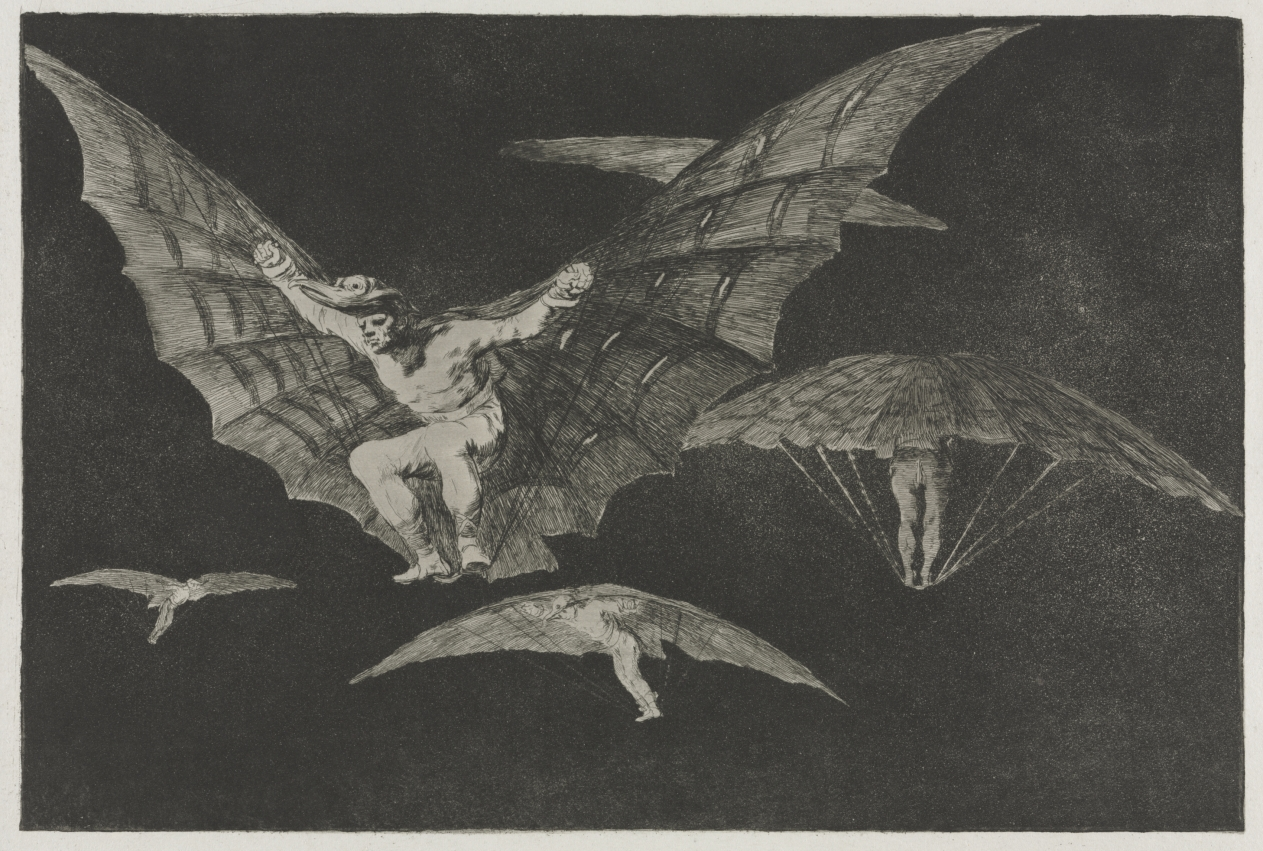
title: The Proverbs: A Way of Flying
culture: Spain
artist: Francisco de Goya (Spanish, 1746–1828)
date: 1864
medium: etching and aquatint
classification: Print